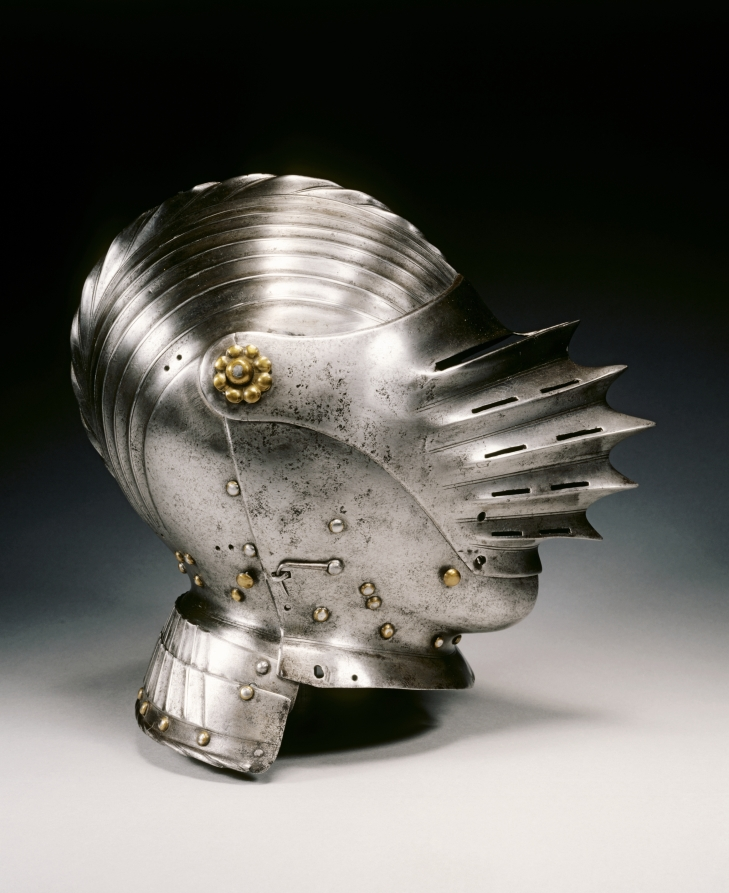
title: Close Helmet in Maximilian Style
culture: Germany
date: c. 1520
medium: steel and brass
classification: Arms and Armor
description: The regular fluting of this helmet is a style known as "Maximilian," named after Maximilian I, Holy Roman Emperor (1493–1519). Besides being decorative the fluting is a strengthening device that works similar to corrugated metal. This decoration would have been costly as it was time consuming to produce and required precise work. It would have only been available to the wealthiest of clients.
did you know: Known as the "Last Knight," Maximilian played a prominent role in this history of armor by building up the armament industry and fostering the modernization of the armorer's craft.